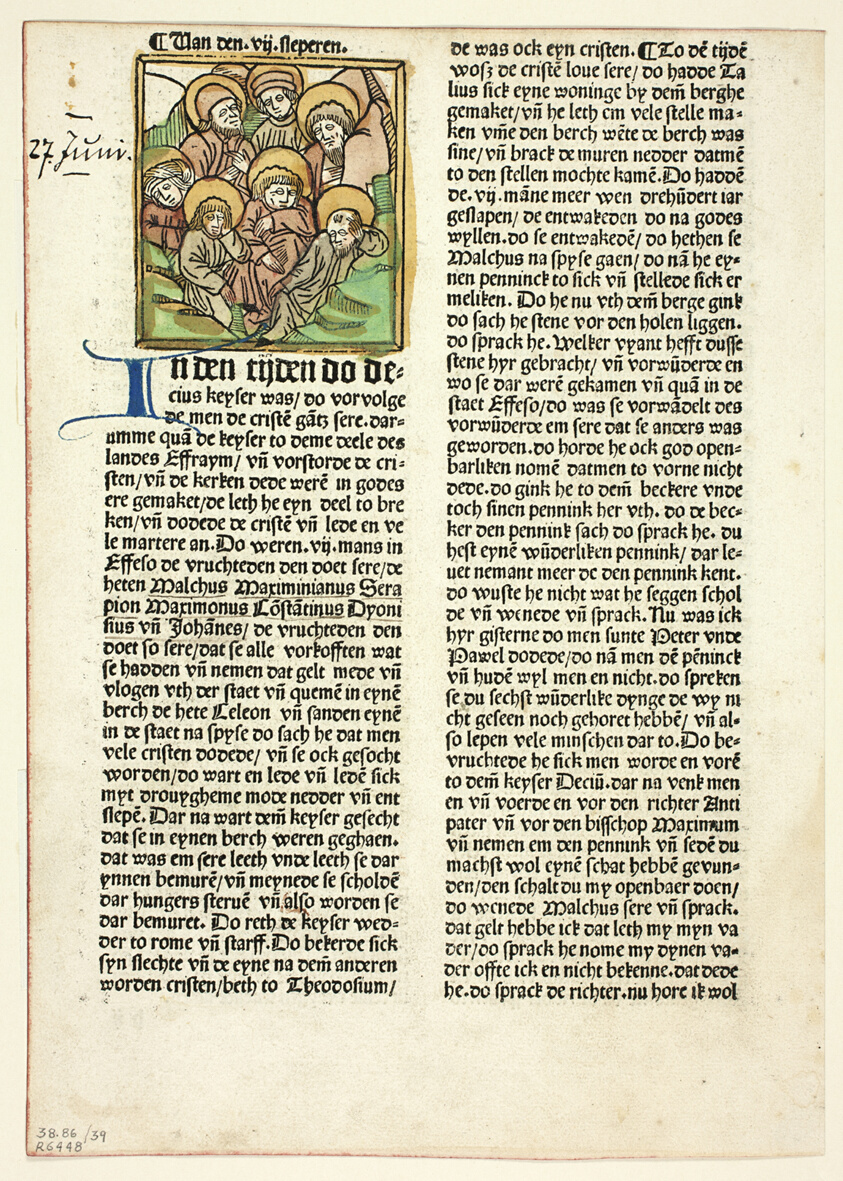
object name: Print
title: The Seven Sleepers from Der Heiligen Leben, Sommerteil (Lives of the Saints, Summertime), Plate 39 from Woodcuts from Books of the 15th Century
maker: Unknown Artist (Magdeburg, late 15th century); printed and published by Simon Koch, called Mentzer (German, active 1486–1503); original text by Jacobus de Voragine (Italian, c. 1230–1298); portfolio text by Wilhelm Ludwig Schreiber (German, 1855–1932)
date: 1487, portfolio assembled 1929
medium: Woodcut in black with hand-colored additions, and letterpress in black with pen and blue and black ink additions (recto), and letterpress in black (verso), on cream laid paper, tipped onto cream wove paper mat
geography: Germany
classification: woodcut; print; prints and drawing